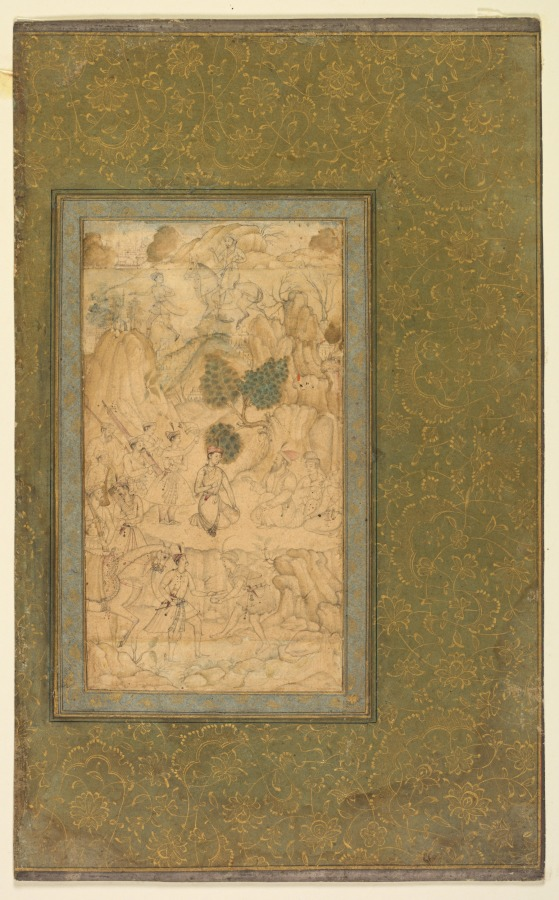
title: A Prince Visiting a Holy Man in a Rocky Landscape (recto)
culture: India, Mughal, 16th century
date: c. 1590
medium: Gum tempera, ink, and gold on paper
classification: Painting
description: A recurring theme in the art of India is the relationship between rulers and the religious practitioners who were believed to control supernatural forces that would aid in the success of rule and war. A prince has come to the abode of a Sufi mystic dervish, who sits with two acolytes in front of a rocky cave that may be his dwelling. The dervish appears to be blessing the prince and the weapons carried by his retinue to help assure success in an upcoming battle. In the foreground, a princely figure leading a horse meets surreptitiously with an eccentric figure holding a squat vessel, possibly filled with a narcotic substance such as bhang, used by many groups of mystics to aid in reaching trance states.